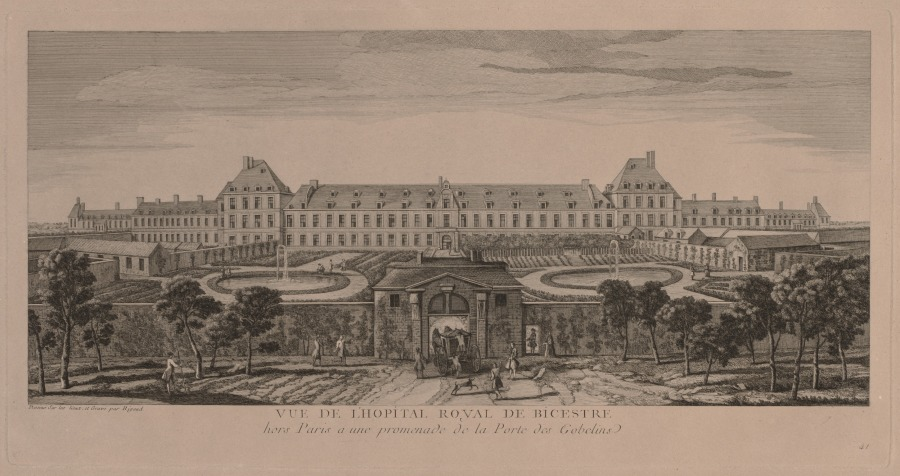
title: The Royal Hospital of Bicestre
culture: France, 18th century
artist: Jacques Rigaud (French, 1681–1754)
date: c. 1720–50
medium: engraving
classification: Print